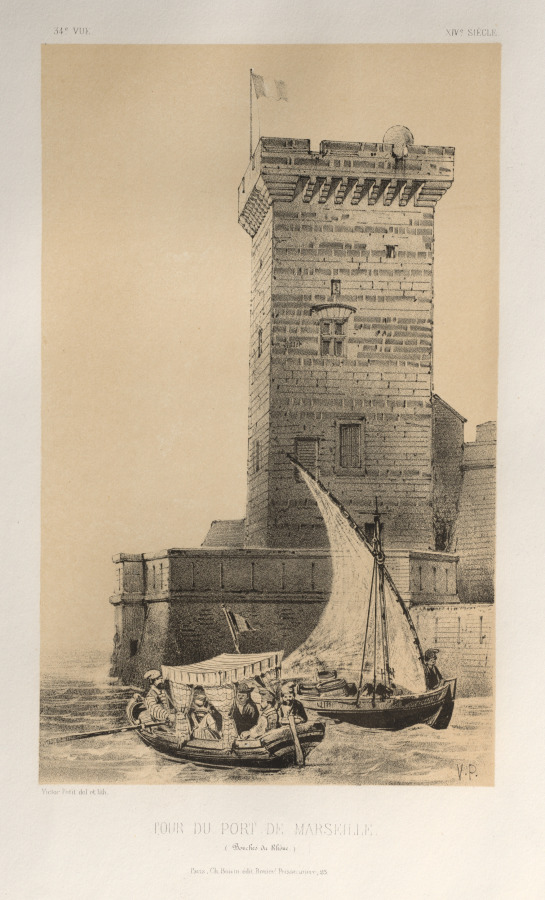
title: Architecture Pittoresque ou Monuments des xveme. Et xvieme. Siecles: Chateaux De France des XV et XVI Siecles: Pl. 34, Tour Du Port De Marseille (Bouches Du Rhône)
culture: France, 19th century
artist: Victor Petit (French, 1817–1874)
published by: Charles Boivin (publisher and editor); Lith de Godard a Paris (printer)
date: 1860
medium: lithograph with tint stone, from portfolio of 100 lithographs with tint stone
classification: Print